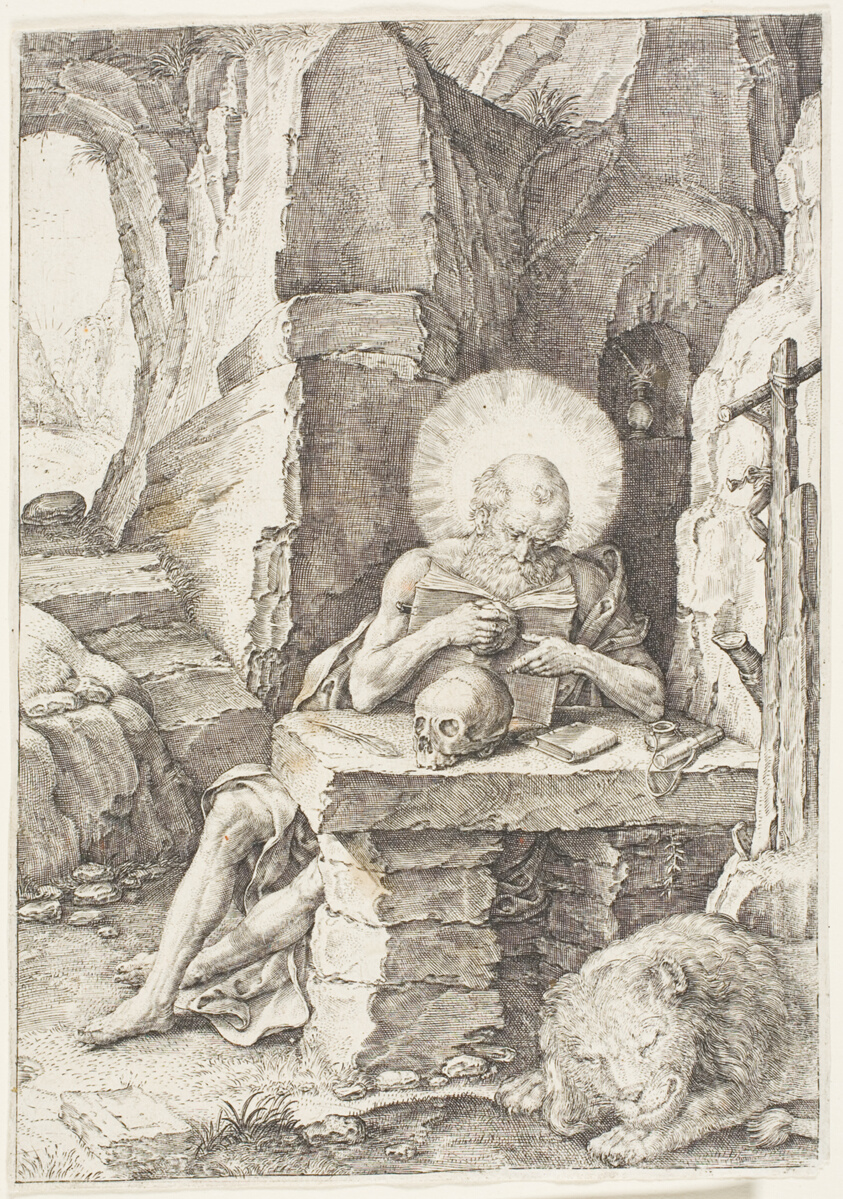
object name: Print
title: Saint Jerome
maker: Raphael de Mey; German, active 16th century; in imitation of; Lucas van Leyden; Netherlandish, c. 1494-1533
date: 1500/99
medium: Engraving in black on ivory laid paper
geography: Netherlands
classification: engraving; print; prints and drawing